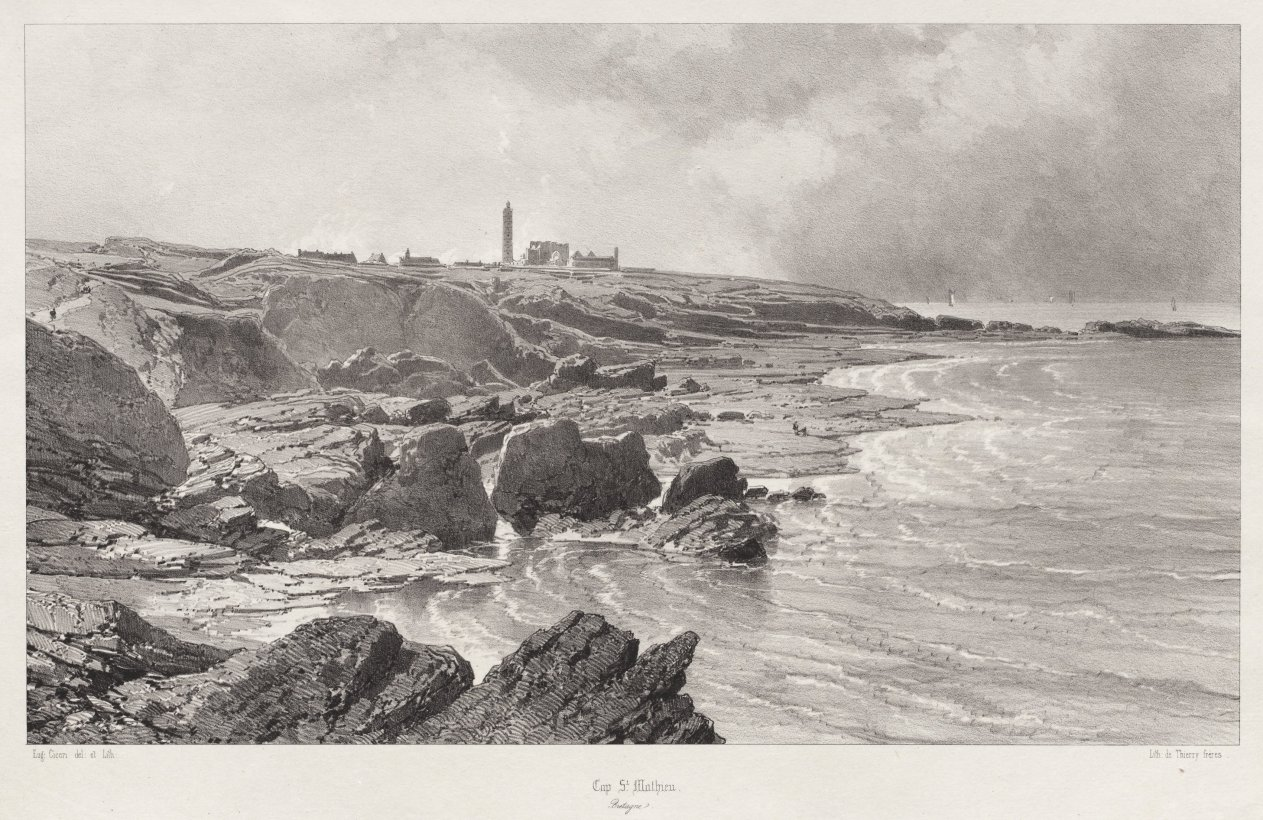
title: Cap St. Mathieu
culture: France, 19th century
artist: Eugène Cicéri (French, 1813–1890)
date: 1846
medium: lithograph on chine collé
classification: Print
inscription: inscribed lower margin in plate: Engraved by J. Greig, from a Drawing by T. Higham, for The Excursions through Sussex. ST. MARY'S HOSPITAL, CHICHESTER, SUSSEX